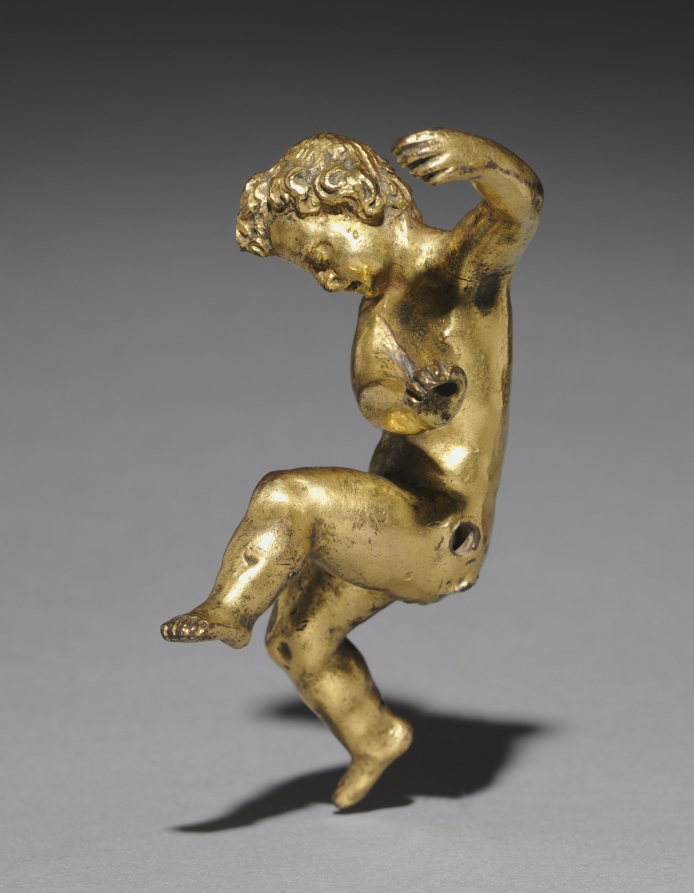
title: Putto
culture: Italy, Rome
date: late 1500s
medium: gilt bronze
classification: Sculpture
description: These gilt bronze putti, or figures of plump male children in the nude, are near mirror images of one another. Both are seated, with their arms flung to the side. Minimal detailing exists in the hands and feet, with the fingers and toes signified only by simple line indentations. The function and original placement of the putti is uncertain, but their posture and the placement of their hands suggest that originally they may have been placed in a larger statue group, perhaps holding either side of a banner, or even a piece of furniture. A will drawn up by Guglielmo della Porta in 1558 mentions the existence of bronze Passion scenes and crucifixes, suggesting that the artist may have created other small bronze groups as well. John Pope-Hennessey attributed these works to della Porta based on their similarity to the figures of Apollo and Artemis in Latona and her Children (Victoria and Albert Museum, London) and the monumental putti in his Tomb of Cardinal Paolo Cesi in Santa Maria Maggiore in Rome, although more recent research points away from della Porta as the maker. Ana Dieglio 2009